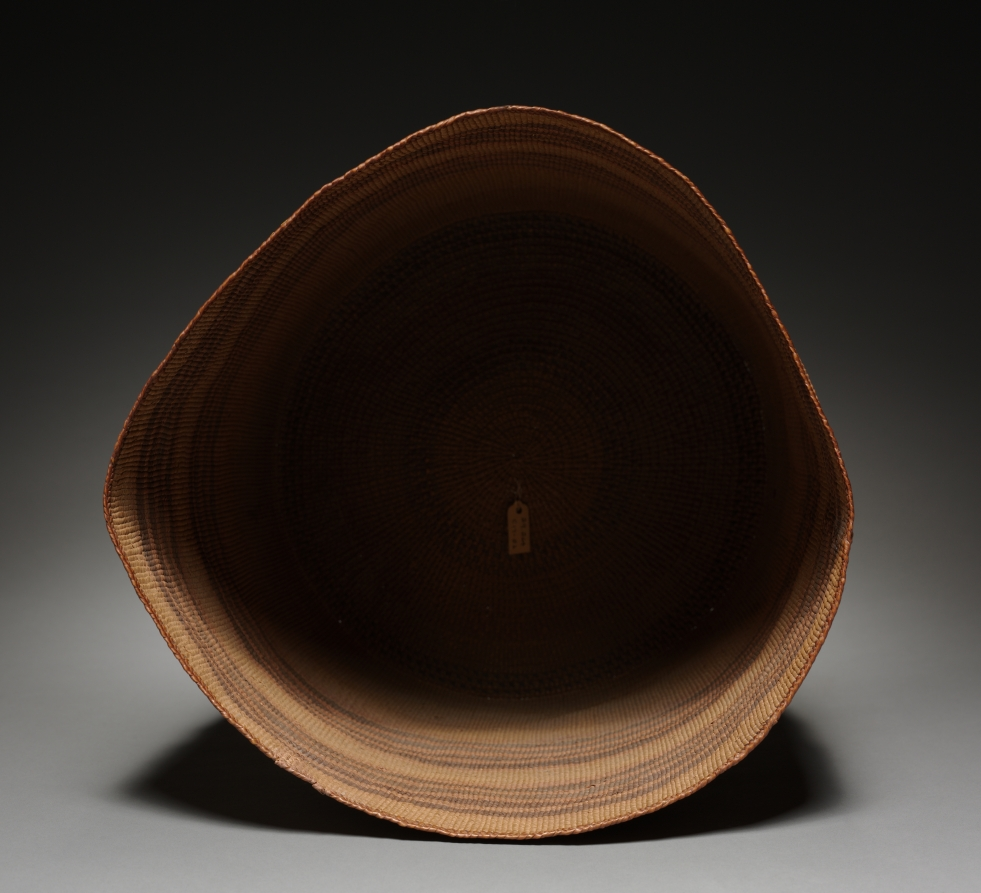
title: Cooking Basket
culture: Northwest Coast, Tlingit, late 19th Century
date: late 1800s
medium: Spruce root; twined, false embroidery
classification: Basketry